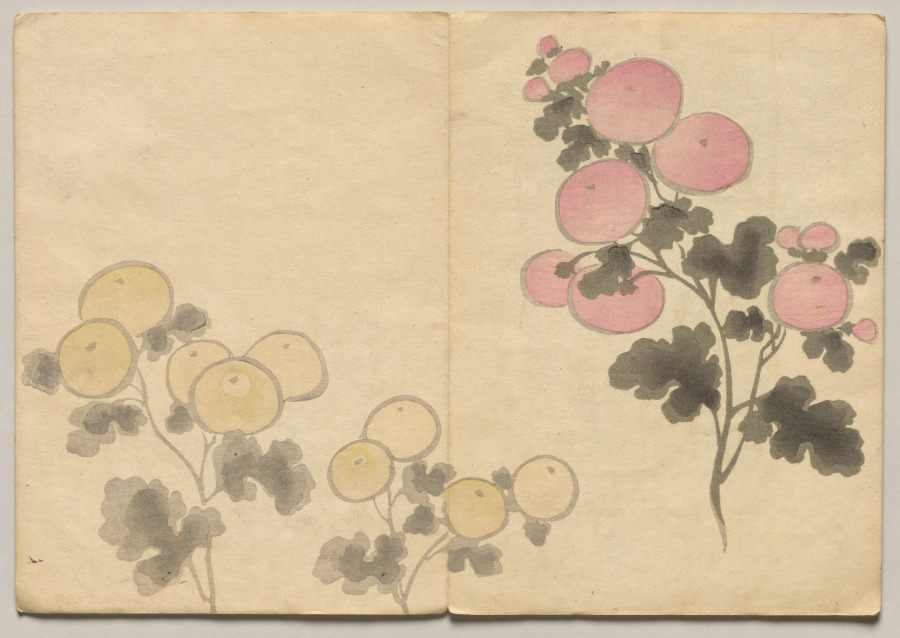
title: Scene from The Kōrin Picture Book (Volume 1)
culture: Japan, Edo period (1615–1868)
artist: Nakamura Hōchū (Japanese, d. 1819)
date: 1800s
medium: page in a woodblock printed folding-; ink and color on paper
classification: Bound Volume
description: Ogata Korin (1658-1716) was one of the most admired artists of Rimpa, or "decorative school painting." These books by the charming later-generation Rimpa artist Hochu record Korin's inventive designs.